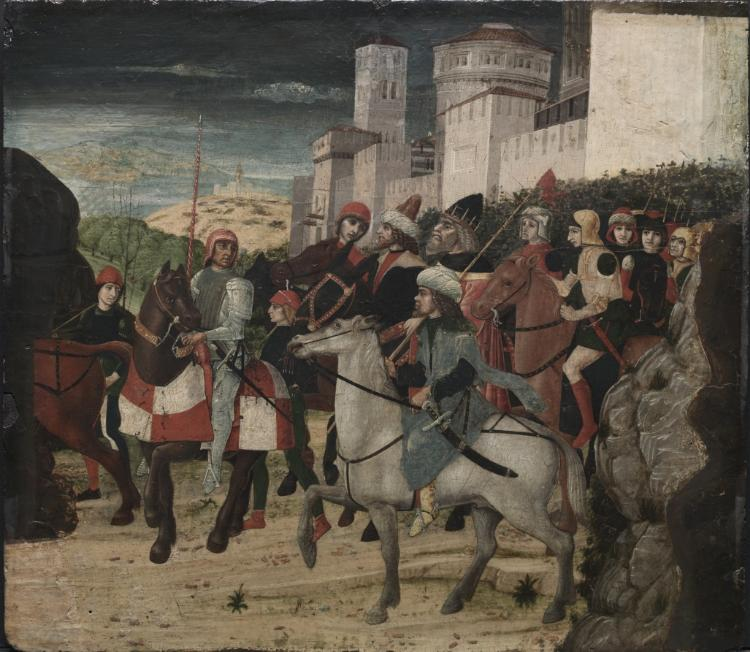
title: Procession of the Magi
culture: Italy, Padua, 15th century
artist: attributed to Bernardo Parentino (Italian)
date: c. 1450–1500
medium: tempera on wood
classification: Painting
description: This work was not originally hung on a wall or displayed as part of an altarpiece. It is believed to have formed a panel on a cassone, a storage chest for clothing. This panel may have been part of a travel chest, which was usually less lavish than those meant to be used in the home. The subject, the Procession of the Magi, was commonly used for travel chests.